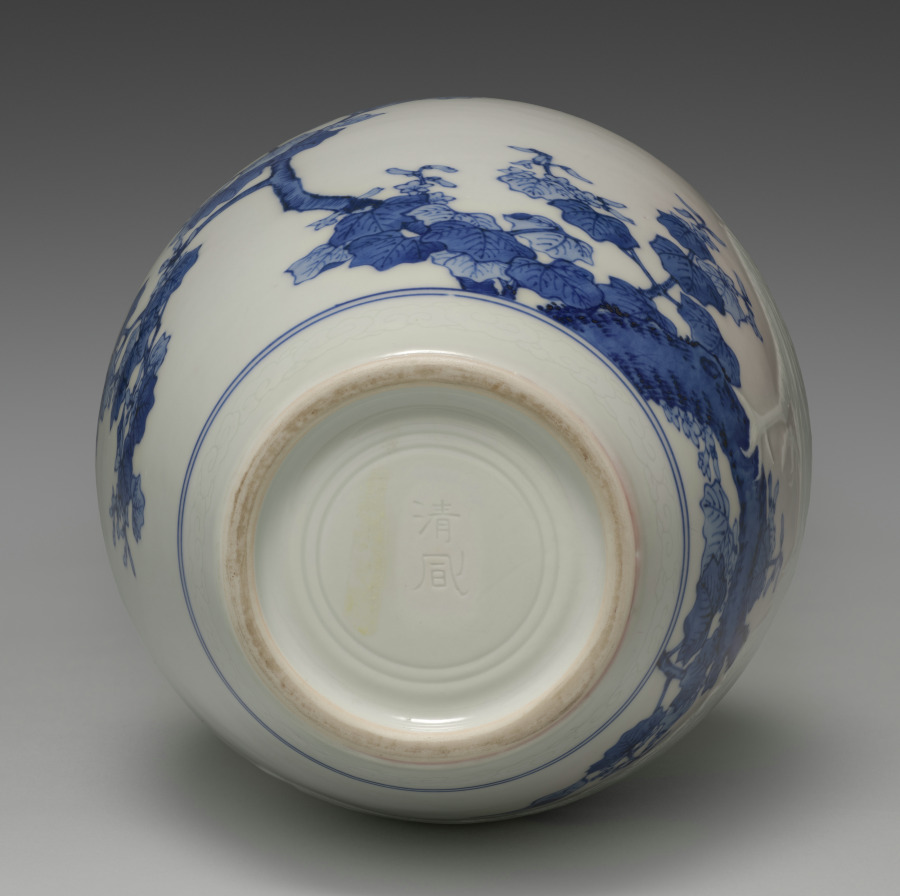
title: Flower Vase with Phoenix in Paulownia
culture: Japan, Meiji period (1868–1912)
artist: Seifū Yohei III (Japanese, 1851–1914)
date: 1897–1914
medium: Porcelain with molded and carved design and underglaze color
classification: Ceramic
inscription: 清風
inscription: 清風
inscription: 清風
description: The phoenix’s commanding presence on this vase was created by adding clay to the surface of the white clay body and then intricately molding and carving it. Then cobalt blue was used to paint the paulownia tree upon which the phoenix perches. Yohei III used a masking technique, covering the phoenix with paper before adding pink color to the area surrounding it. Firing with an allover transparent glaze created a glossy surface, with the phoenix standing out boldly from the background. The mythical bird’s long tail sweeps majestically around the vessel so that one must move around it to see the eyespots in its plumes. A symbol of imperial power in both China and Japan, the phoenix is said to alight only in the paulownia tree. Upon close inspection of its face, one can see that the phoenix’s eye is in yellow under the glaze. The scene is set off at the bottom with a double band of underglaze blue above an incised ring of cloud. Once Yohei III had created his creamy translucent taihakuji glaze, he began applying it over the entire surface of an ivory clay body with motifs in low relief to achieve a creamy white-on-white design. He then began using the combination of gradated pink around raised motifs on a typical white porcelain clay body like the one for this vase. He masked his low-relief designs with paper before sprinkling diluted iron oxide glaze onto the surrounding areas through a net with a brush. These unpigmented elements stand out as starkly white against the gentle pink blush color that surrounds them. Still later, he added pink to the translucent creamy glaze he used in kanpakuji works and used it over motifs in relief on an ivory clay body for an overall pink-tinged cream effect (see CMA 2022.198).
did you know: In 1893, Seifū Yohei III became the first ceramist to be appointed as an Imperial Household Artist under a system introduced by the Japanese government in 1890.